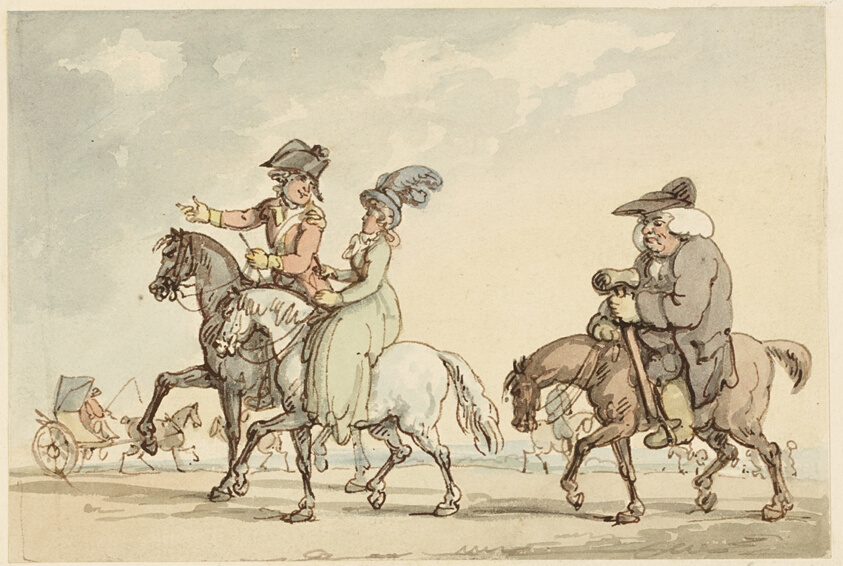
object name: Drawing and Watercolor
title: Study for Comforts of Bath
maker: Thomas Rowlandson (English, 1756-1827)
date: c. 1798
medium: Pen and brown ink with brush and watercolor, on cream wove paper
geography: England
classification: watercolor; drawings (visual works); prints and drawing